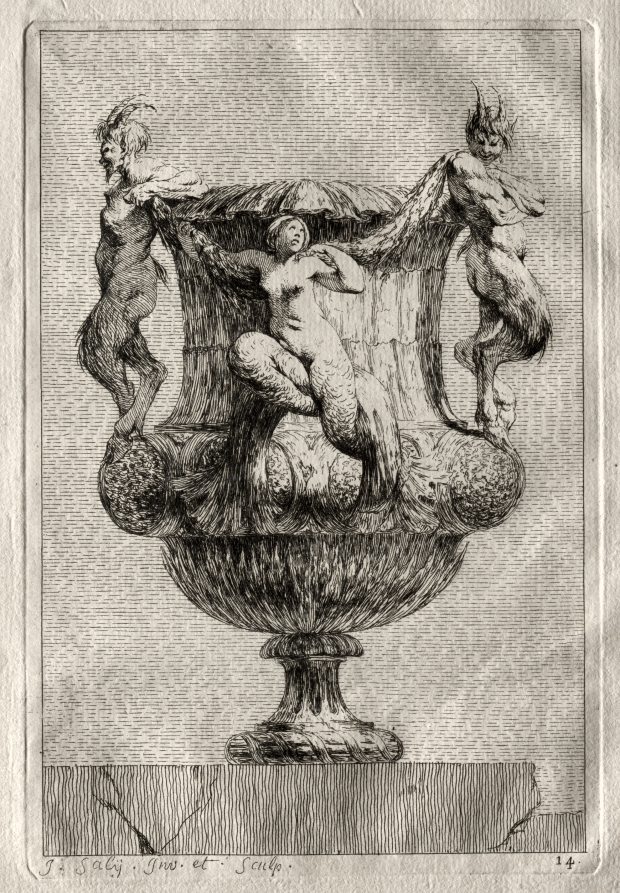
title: Suite of Vases: Plate 14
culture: France, 18th century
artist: Jacques François Saly (French, 1717–1776)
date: 1746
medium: etching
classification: Print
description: Jacques François Joseph Saly created an etched suite of 30 imaginary vase designs while studying in Rome. Throughout the series, he let his skill and imagination run wild on the theme of bacchants by inventively incorporating animals, satyrs, and maenads—as well as faces and grotesques (fantastic figures and beasts)—into various designs. Published in Paris, the series nourished an appetite for the revival of mythological and classical elements in decorative arts, and may have also inspired Jean-Honoré Fragonard’s suite of bacchanalia images.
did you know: The voluptuous two-tailed mermaid figure in the center of this design may be a nereid. As the undine daughters of Neptune, nereids were often part of Bacchus's entourage in classical mythology.